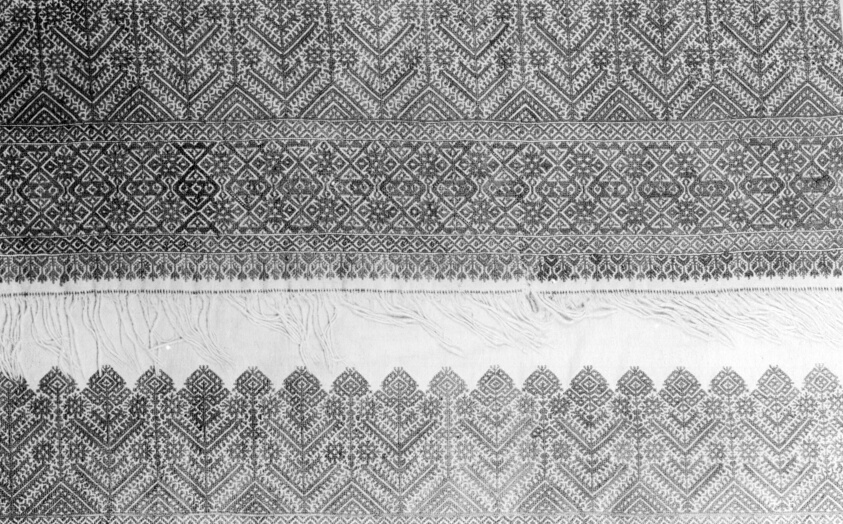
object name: Costume and Accessories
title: Scarf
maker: Morocco, Fès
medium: Silk embroidery on plain cream-colored cotton cloth. Stitch: Holbein stitch over 2 threads. Stem stitch, button-hole stitch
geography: Morocco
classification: textile; weaving; needlework (visual works); costume; dress (garment); clothing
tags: morocco